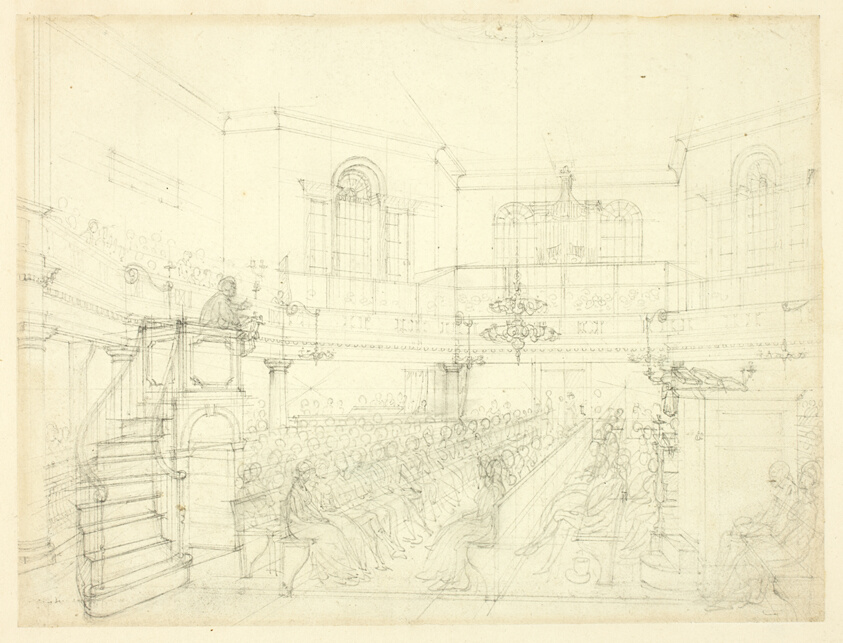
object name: Drawing and Watercolor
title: Study for The Magdalen Chapel, from Microcosm of London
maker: Augustus Charles Pugin (English, born France, 1762-1832); Thomas Rowlandson (English, 1756-1827)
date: c. 1809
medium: Graphite on ivory wove paper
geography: England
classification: graphite; drawings (visual works); prints and drawing